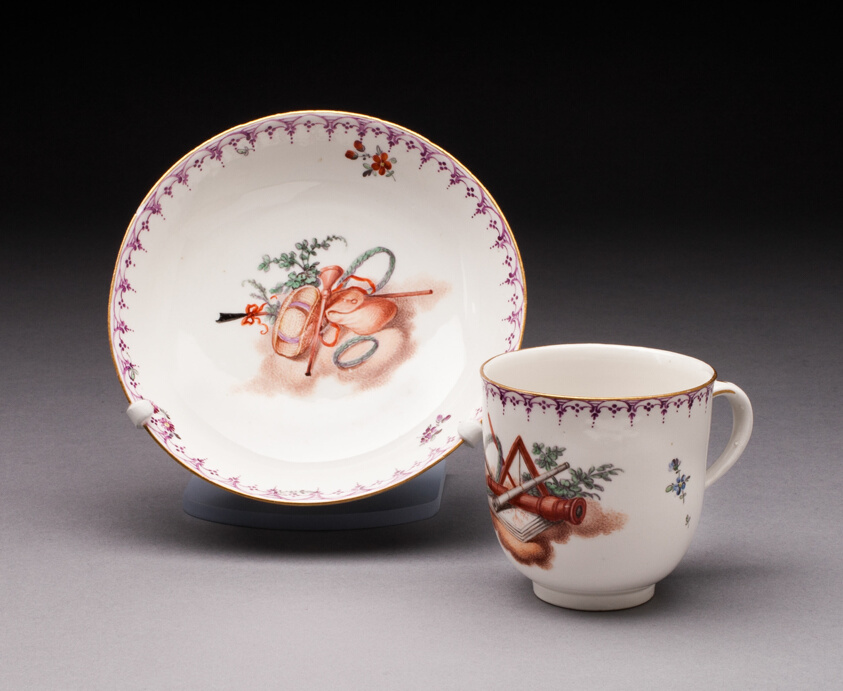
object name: Ceramics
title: Cup and Saucer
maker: Frankenthal Porcelain Factory; German, founded 1755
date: c. 1779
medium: Hard-paste porcelain with polychrome enamels and gilding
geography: Frankenthal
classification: drinking vessel; porcelain; ceramics; european decorative arts